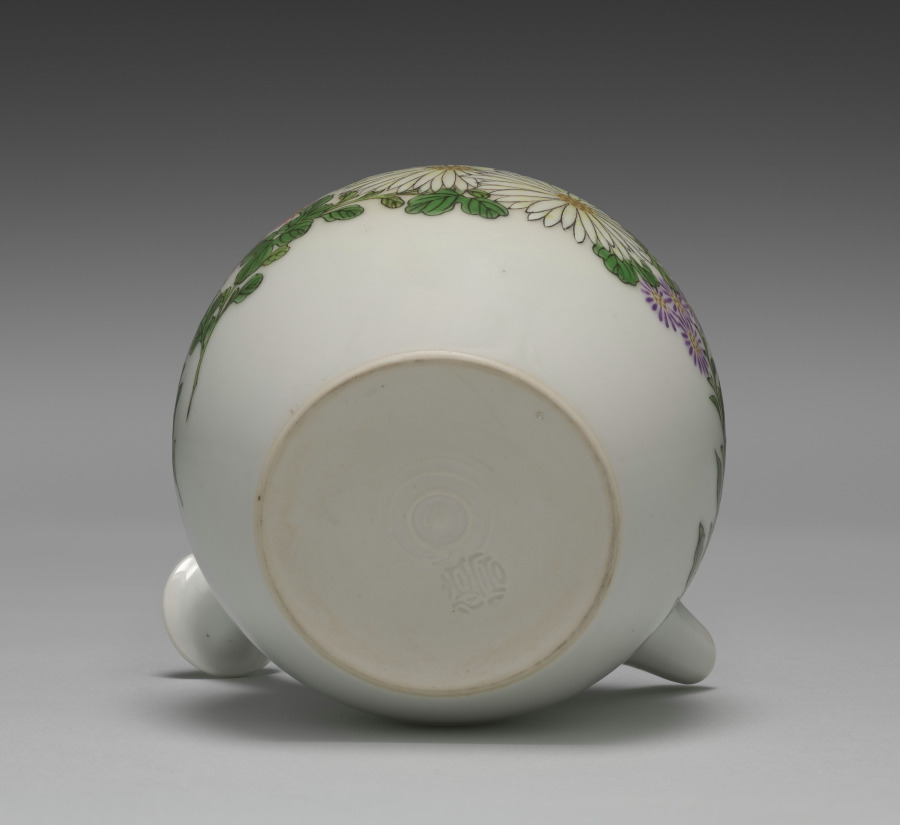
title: Teapot with Chrysanthemums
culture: Japan, Meiji period (1868–1912)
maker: Seifū Yohei III (Japanese, 1851–1914)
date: 1912–14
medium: Porcelain with overglaze color enamel and gold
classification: Ceramic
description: This teapot with recessed lid has a bold, realistic design of pale yellow and white chrysanthemums rendered in overglaze color enamels and dotted gold centers. Black contour lines define the yellow and white flowers and their green stems and leaves. Small pink and purple chrysanthemums are rendered as simple motifs, their shapes defined in contrast to the white ground of the pot.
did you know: This side-handled teapot is designed for brewing and serving sencha.